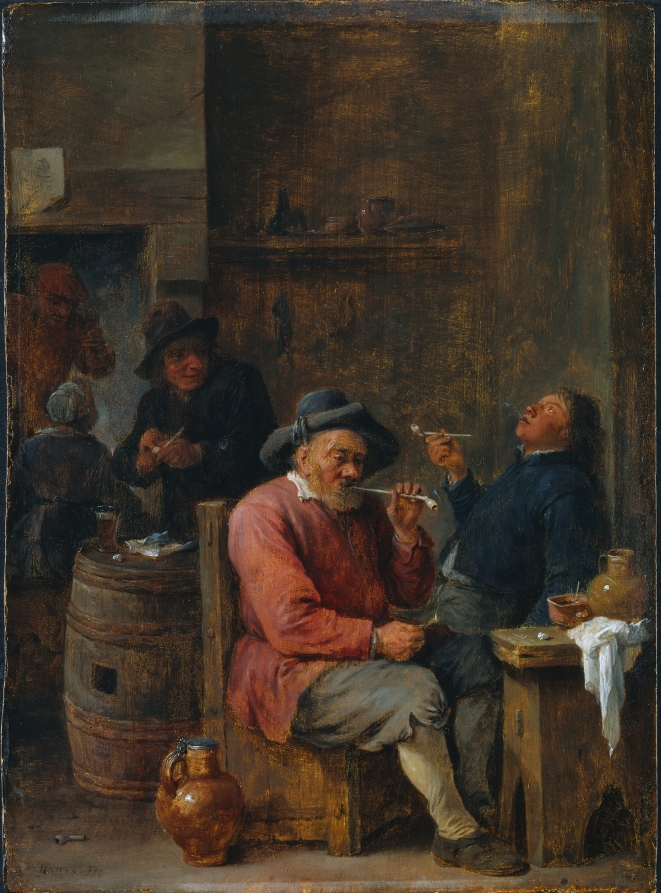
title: Peasants Smoking in an Inn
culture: Flanders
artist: David Teniers (Flemish, 1610–1690)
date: c. 1640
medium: oil on wood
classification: Painting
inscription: signed lower left: D. TENIERS. FEC.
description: David Teniers the Younger was a popular artist who specialized in small paintings of rustic Flemish life in the 1600s. In works such as Peasants Smoking in an Inn, an older man and a younger man in the foreground smoke tobacco. The younger man rests limply against the wall and his head lolls back, a gesture that symbolized that he had overindulged in smoke. Another standing man prepares his pipe and watches the younger man with amusement. Tobacco was a novelty in the 1600s, introduced from the Americas and East Indies with other new imports such as sugar cane and rice, and was believed to be a medicinal product. It was particularly recommended for people who lived in "waterish places" such as Antwerp, the capital of Flanders, where Teniers painted this scene. Although many medical practitioners believed tobacco to be a cure for numerous ailments, moral opponents to smoking criticized it as a danger to health and morals. The mixed reputation and widespread popularity of tobacco smoking thus made it a marketable and amusing subject for Flemish artists such as Teniers.